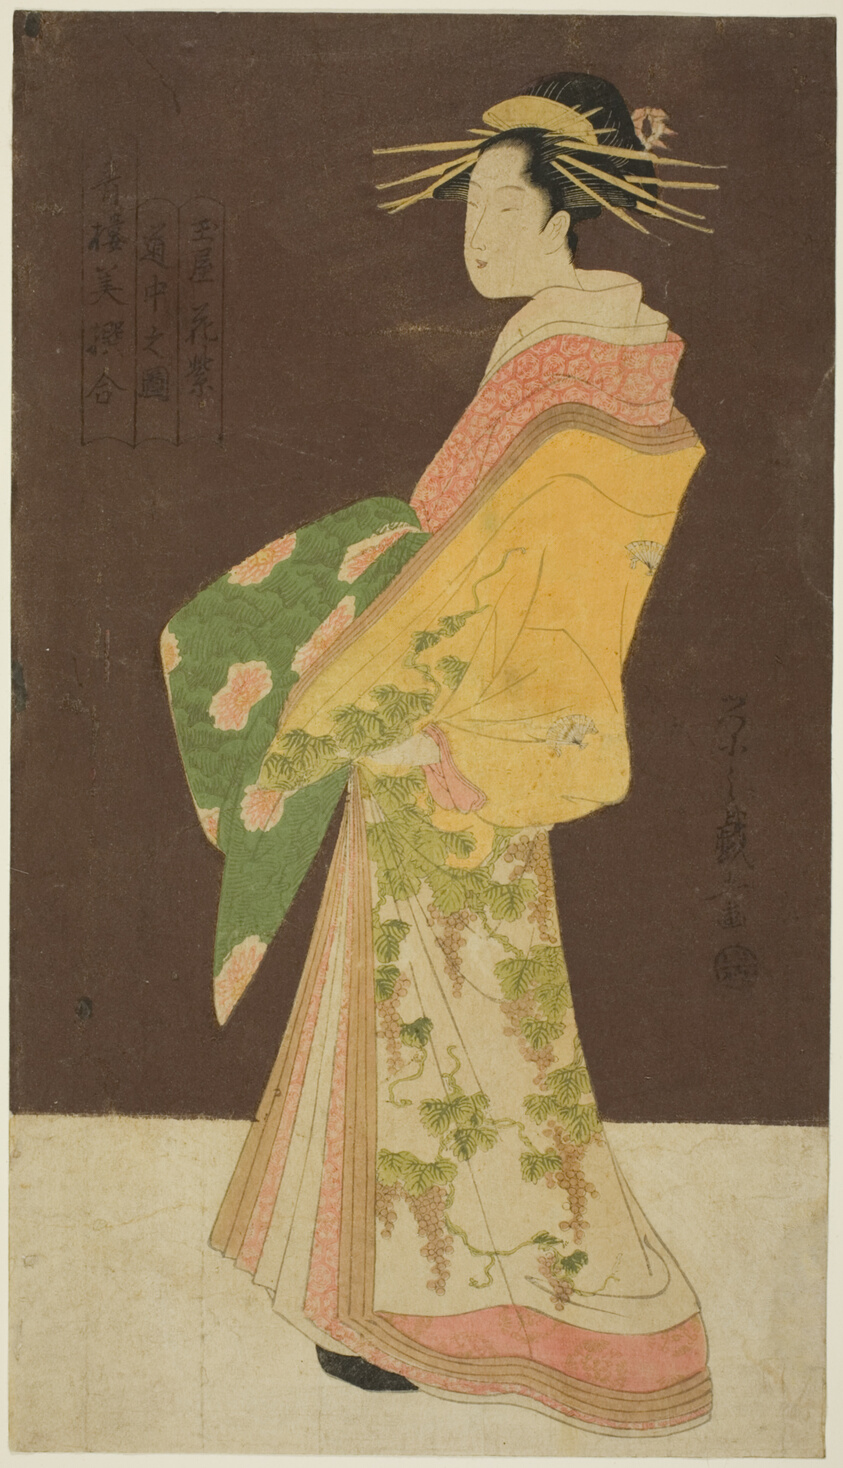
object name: Print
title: A Selection of Beauty from the Pleasure Quarters (Seiro bisen awase): Hanamurasaki of the Tamaya in Procession (Tamaya Hanamurasaki dochu no zu)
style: Japanese (culture or style)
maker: Chobunsai Eishi; Japanese, 1756-1829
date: c. 1795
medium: Color woodblock print; oban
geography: Japan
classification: woodblock print; print; asian art